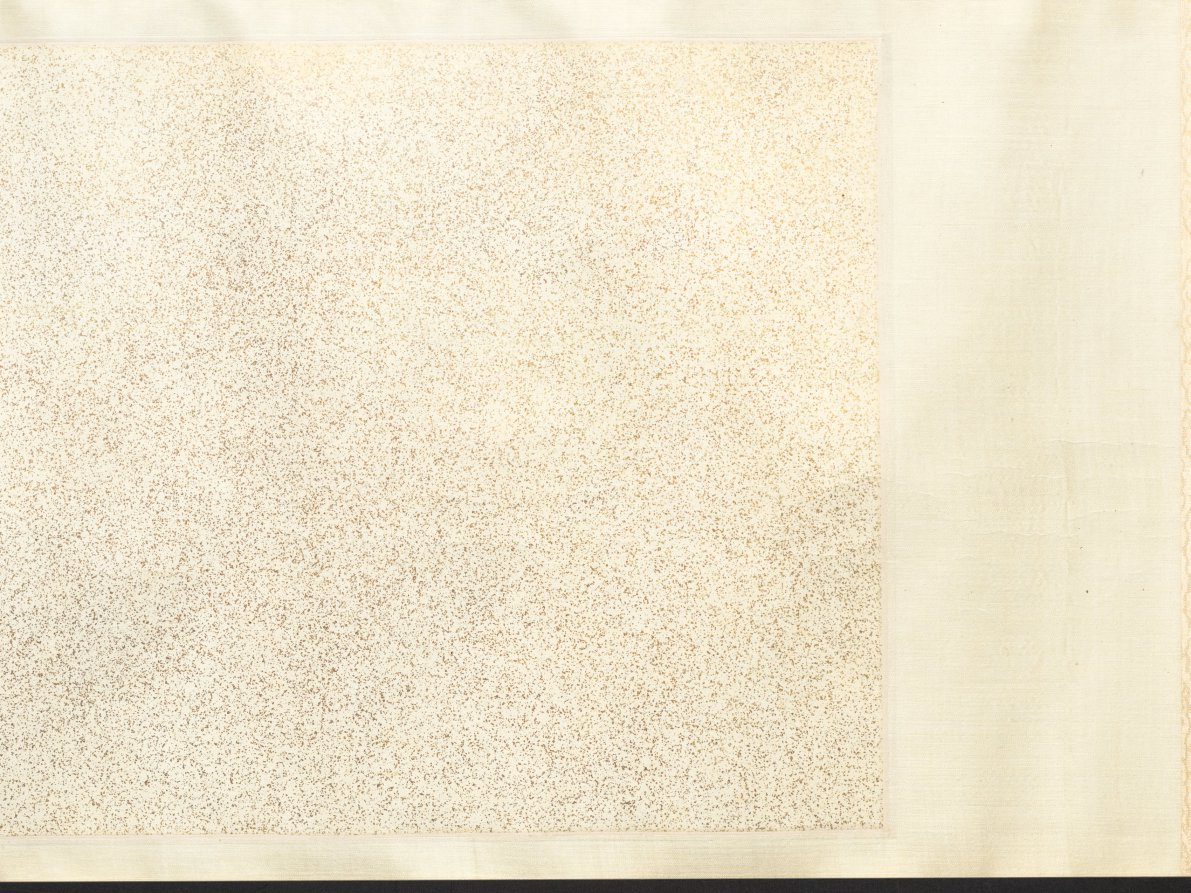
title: Fisherman's Joy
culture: China, Ming dynasty (1368–1644)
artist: Qian Gu (Chinese, 1508–c. 1578)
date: 1572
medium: Handscroll; ink and light color on paper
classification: Painting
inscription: Artist's inscription, signature, and seal: On the autumn day of the jen-shen year [1572], P'eng-ch'eng, Ch'ien Ku painted [this]. [seal] Hsüan-ch'ing shih. 2 colophons, both dated 1689, and 5 additional seals of Yün Shou-p'ing (1633-1690).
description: This painting has a scene showing two small crafts, each manned by two fishermen, practicing a traditional fishing method. In one of them, a man uses a bamboo pole to direct the movements of a cormorant bird sent into the water. Cormorant fishing, witnessed in some areas of the lower Yangzi River, appears in Zhe school paintings. Qian Gu may have borrowed these narrative figure scenes from Zhe school paintings, while his vantage point, brushwork, and soft tones align with the Wu school style. Scenes of fishermen appealed to urban and educated audiences who idealized the self-sufficient independence of fisherfolk.